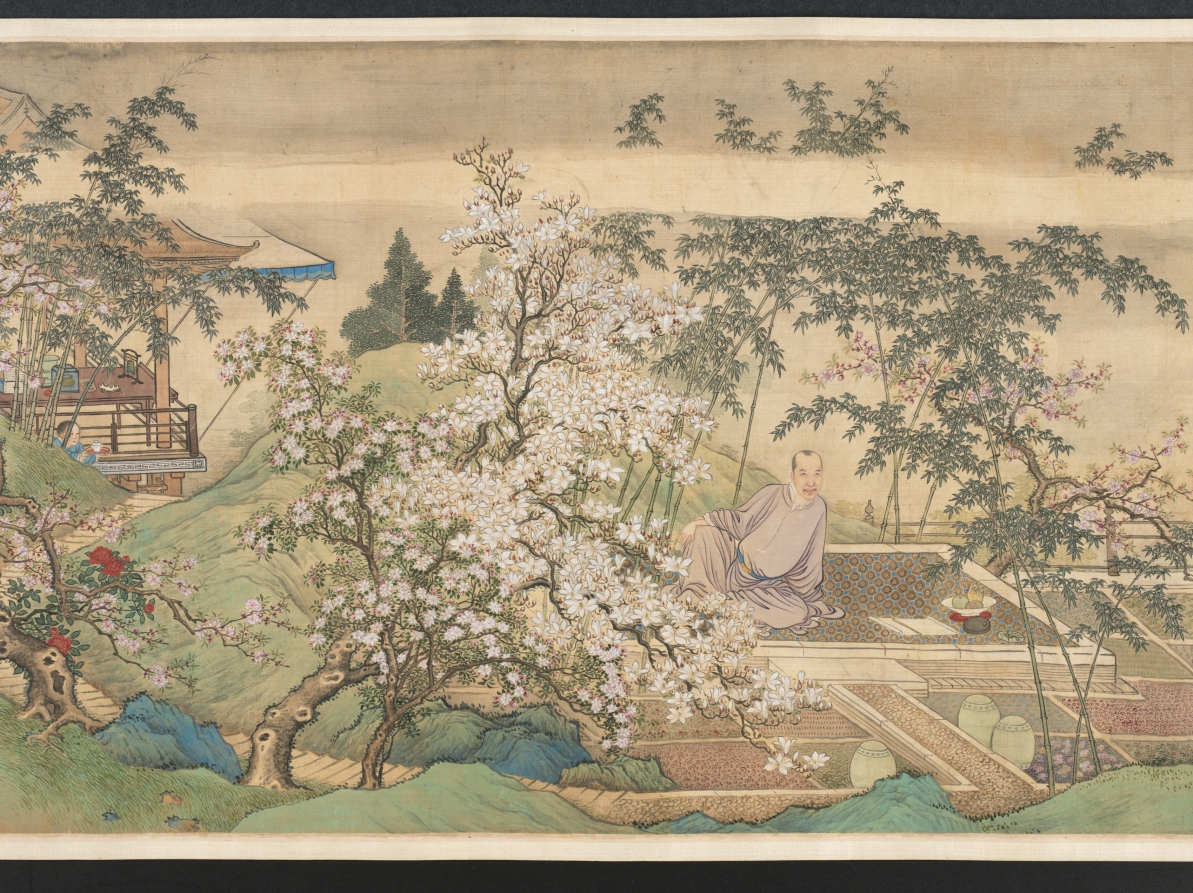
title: Cleansing Medicinal Herbs in the Stream on a Spring Day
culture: China, Qing dynasty (1644-1911)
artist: Yu Zhiding (Chinese, 1647–c. 1716)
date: 1703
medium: Handscroll; ink and color on silk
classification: Painting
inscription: Title by Chen Yixi.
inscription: 姑射仙人冰雪膚，新詩傳唱滿通都。/ 極知遲暮難為別，更展春泉洗藥圖。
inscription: Colophon by Chen Tingjing 陳廷敬 (1639–1712). Colophon by Wang Hongxu 王鴻緒 (1645–1723), dated 1707. Colophon by Song Luo 宋犖 (1634–1714). Colophon by Liu Yan 劉巗. Colophon by Jing Xikui 涇西夔. Colophon by Liu Yan 劉巗. Colophon by Cao Yin 曹寅. Colophon by Wang Shihong 汪士鋐. Colophon by Wang Shidan 王式丹 (1645–1718), dated 1712. Colophon by Shi Shenyi 史申義 (1661–1712), dated 1712. Colophon by Yin Yuqing 殷餘慶, dated 1712.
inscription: Colophon by Chen Shixia 陳時夏, dated 1729.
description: A famous portraitist, Yu Zhiding here depicts the likeness of Shi Shenyi 史申義 (1661–1712), an official and poet. Master Shi, a sickly man, was deeply interested in medicinal science. The opening section of the scroll features a boy washing a fungus in fresh spring water, a basket of medicinal herbs by his side. Other servants carry a fan, a bundle of scrolls, and a cup of tea or hot wine. Master Shi sits in a bamboo grove, surrounded by fields of herbs. Returning swallows, pink peach blossoms, and blooming magnolia indicate spring, whereas the fungus conveys wishes for long life. The spring theme may express the artist’s wish for his friend’s recovery.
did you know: In the pavilion are some of Shi Shenyi’s scholarly accoutrements: a stack of books, an antique zun 尊 (wine vessel), a brush holder, an ink stone, and a small chime.